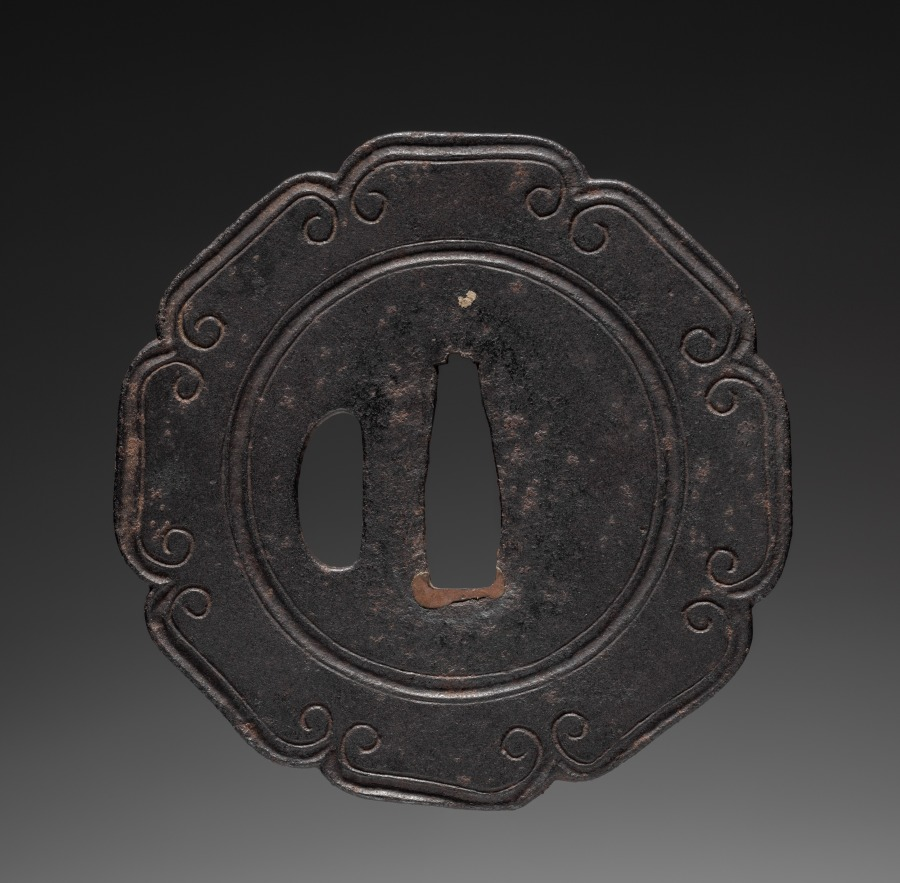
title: Sword Guard (Tsuba)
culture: Japan, possibly Edo period (1615-1868)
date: c. 1615–1868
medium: iron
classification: Arms and Armor